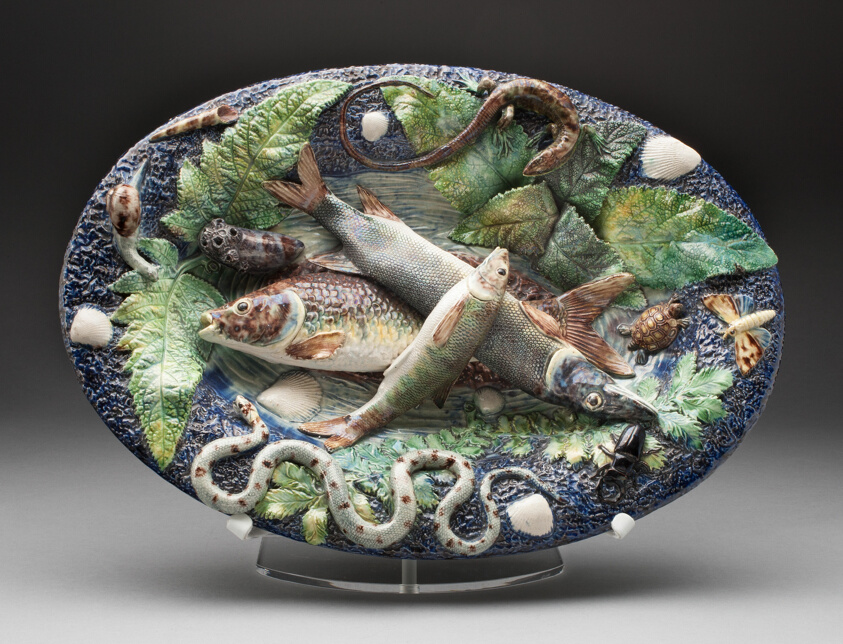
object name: Ceramics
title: Oval Dish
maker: Paris, France; In style of Bernard Palissy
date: Mid 19th century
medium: Tin-glazed earthenware (majolica)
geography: Paris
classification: dish (vessel); earthenware; european decorative arts; ceramics